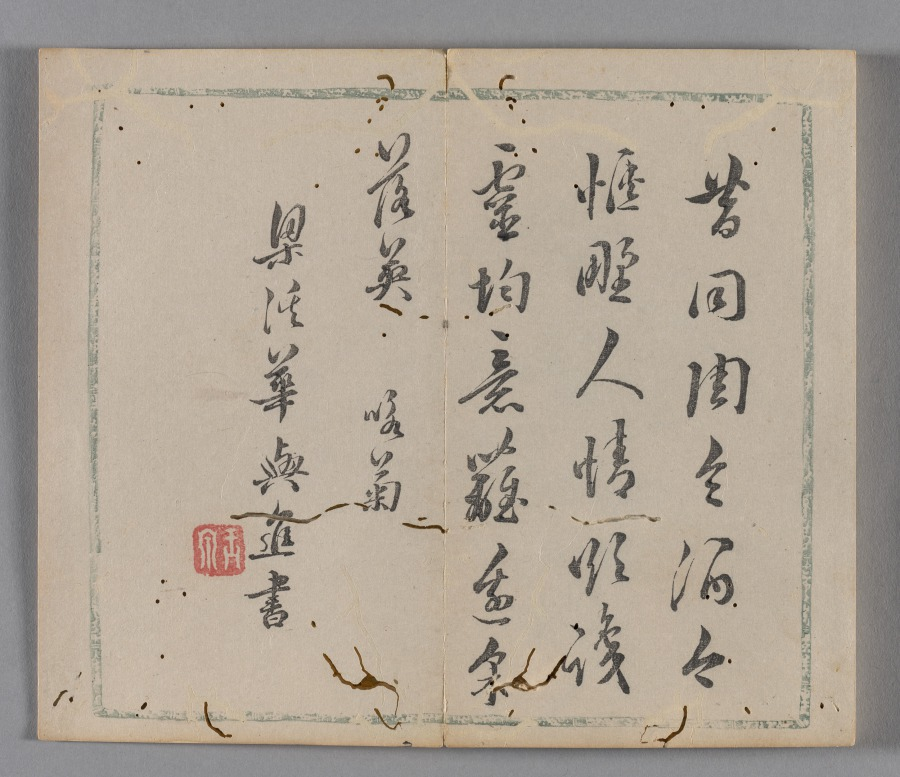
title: Ten Bamboo Studio Collection of Calligraphy and Painting: Round Fans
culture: China, Qing dynasty (1644-1911)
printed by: Hu Zhengyan (Chinese, c. 1584–1674)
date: 1633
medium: Woodblock-printed book; ink and colors on paper; first edition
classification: Print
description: Color printing reached a level of perfection in the early 1600s, as seen in this Ten Bamboo Studio Collection of Calligraphy and Painting and the Mustard Seed Garden Manual of Painting (printed 1679 and 1701). The painterly quality, precision in registering (aligning) the woodblocks, and harmonious colors made them the most successful color print editions in Chinese history. Both editions were printed and compiled in Nanjing, spread nationwide, and had a great impact on the arts in Japan and Korea.